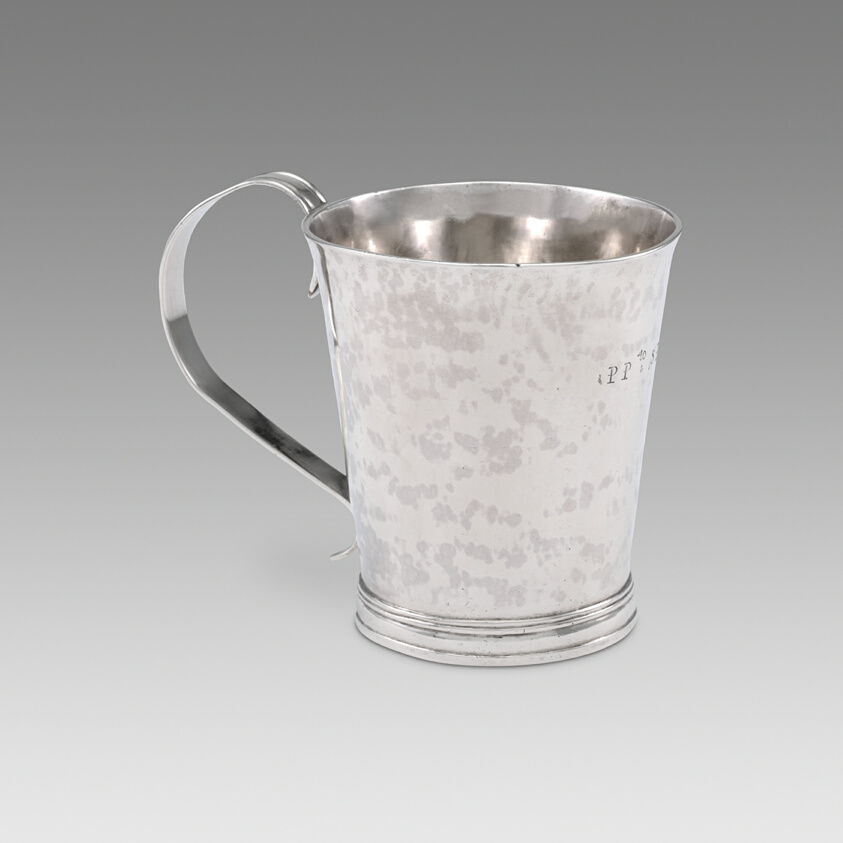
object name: Metalwork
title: Cup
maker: Joseph Loring (American, 1743–1815); Boston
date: 1764–75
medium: Silver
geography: Boston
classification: drinking vessel; silver; american decorative arts; american arts; decorative arts